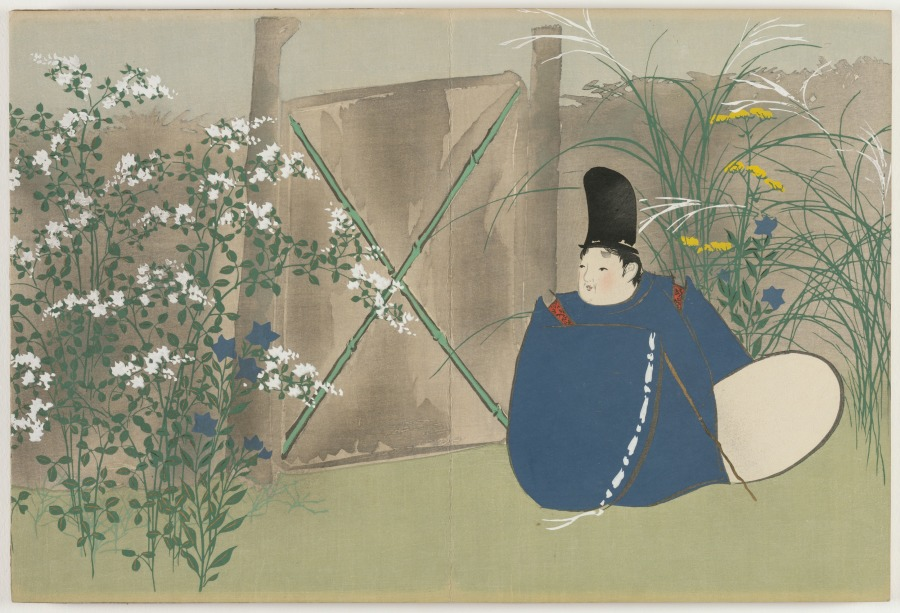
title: Flowers of a Hundred Worlds (Momoyogusa): Nakaguni (Nakaguni)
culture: Japan, Meiji period (1868–1912)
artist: Kamisaka Sekka (Japanese, 1866–1942)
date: 1909–10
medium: color woodcuts with gold and silver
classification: Bound Volume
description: This print from a set of three woodblock printed albums displays the graphic design prowess of Kamisaka Sekka. The images were first distributed one by one to subscribers to the series but later were reissued in bound form, like this book, for mass consumers. Each print features a vignette taken from nature or Japanese literature. Many of the scenes have a long history in Japan, originating in the 900s or 1000s and having been interpreted by all manner of artists since that time. Sekka’s selections hew closely to precedents from the Rinpa style originated by painter Tawaraya Sōtatsu (c. 1570–c. 1640) and calligrapher Hon’ami Kōetsu (1558–1637).